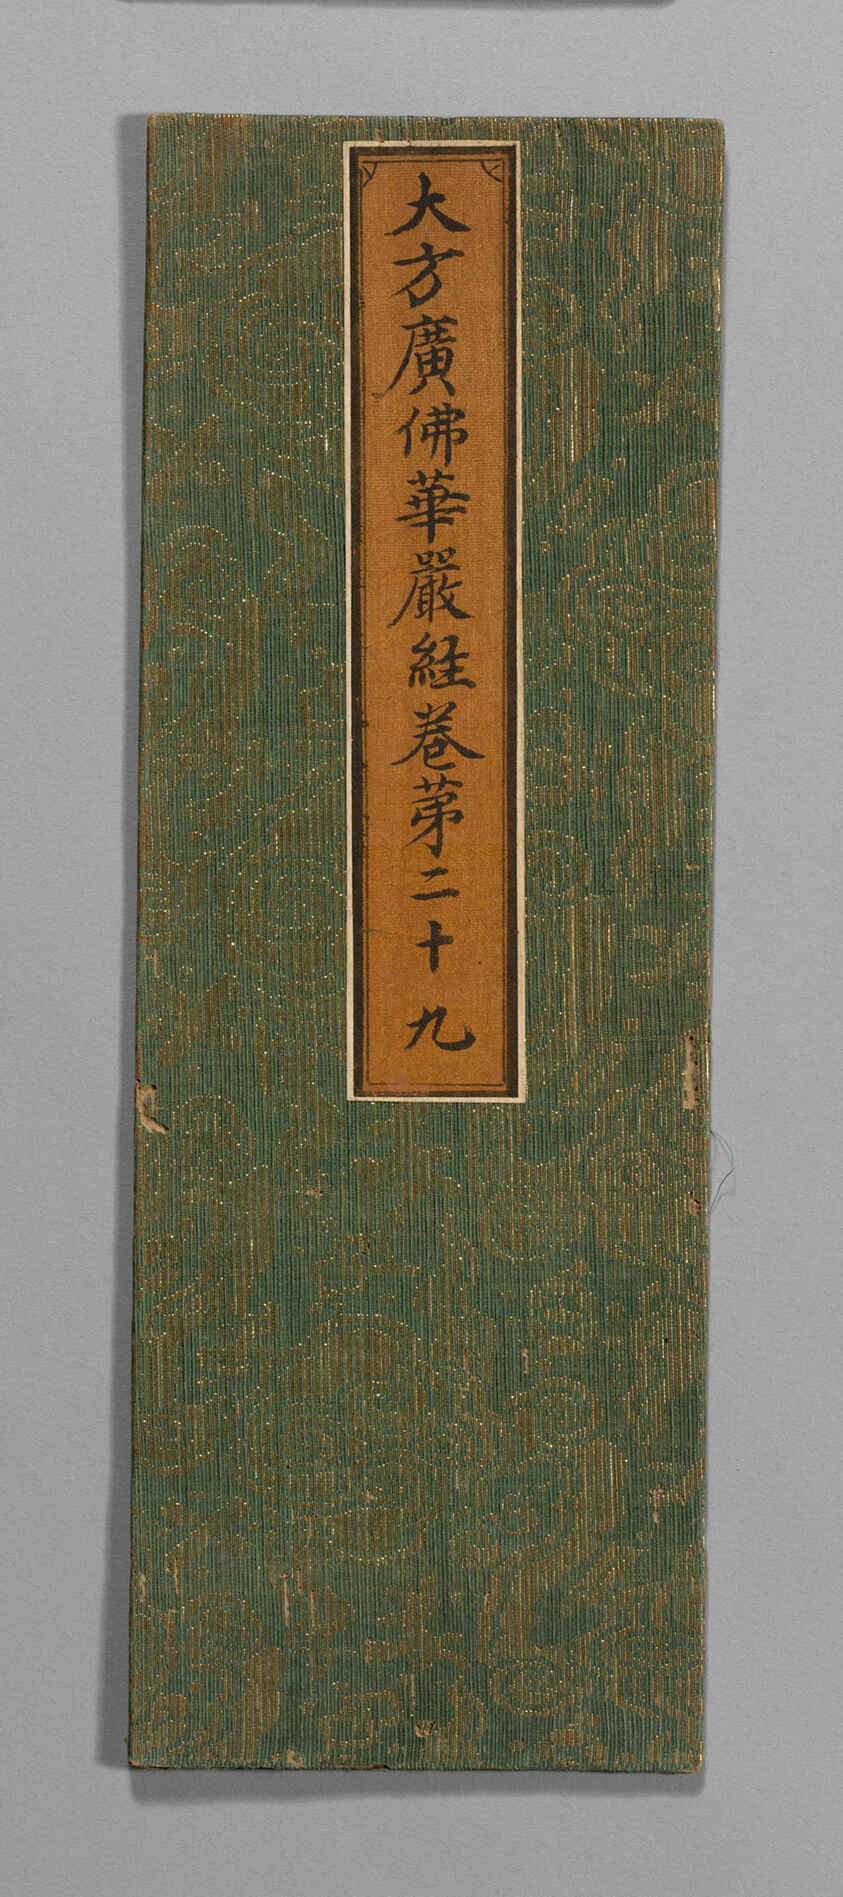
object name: Textile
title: Sutra Cover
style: ming, Chinese (culture or style), East Asian, asian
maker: China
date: Ming dynasty (1368–1644), c. 1590's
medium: Silk and gold-leaf-over-lacquered-paper strips, gauze weave with supplementary patterning wefts; label: silk, plain weave; painted with ink, glued over paper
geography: China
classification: textile; weaving